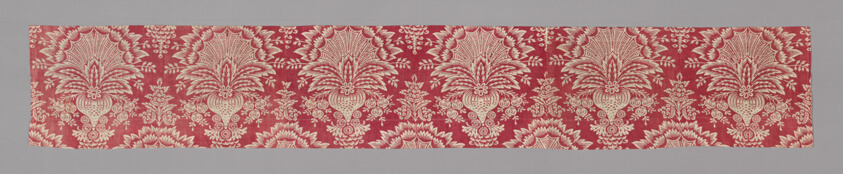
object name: Textile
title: Panel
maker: France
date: c. 1830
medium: Cotton, plain weave; block printed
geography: France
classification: textile; weaving - printed; printed textile